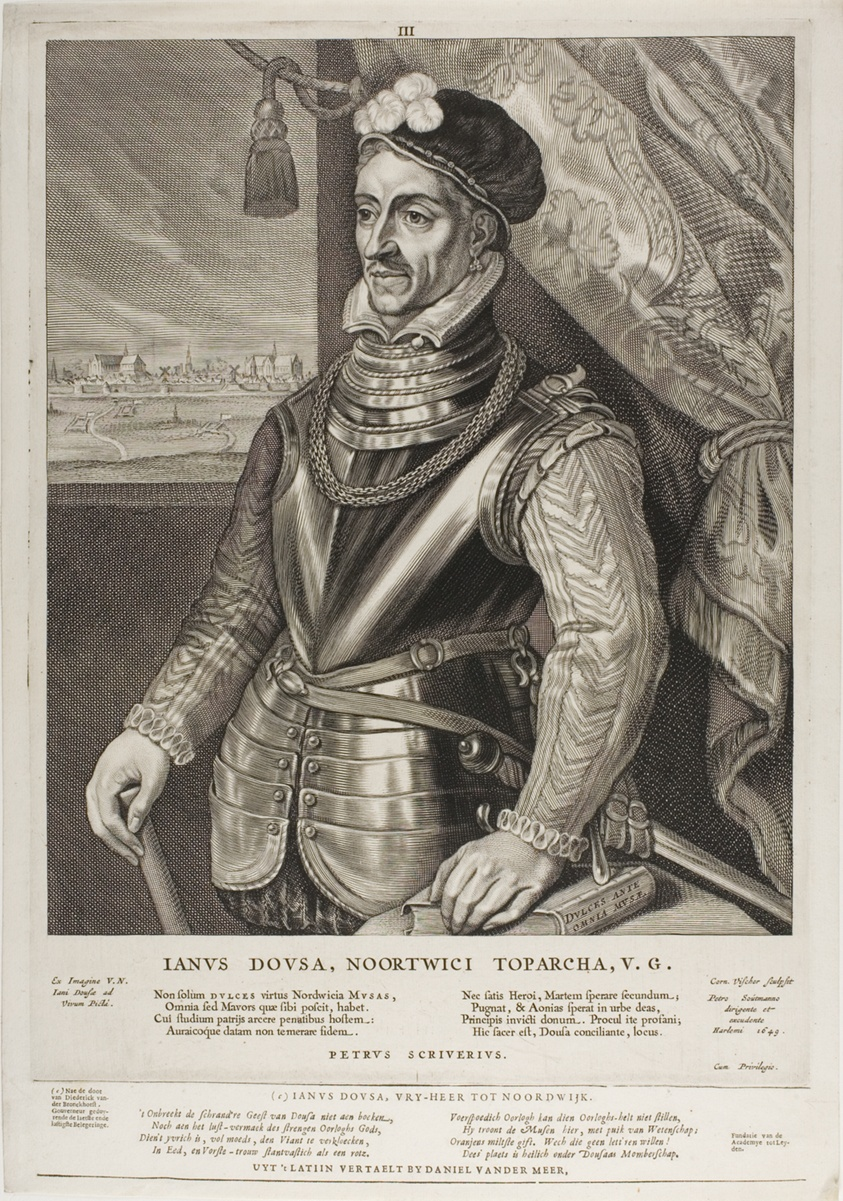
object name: Print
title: Jan van der Does, plate 3 from Quatuor Personae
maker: Cornelis Visscher (Dutch, c. 1629-1658)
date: 1649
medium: Engraving and letterpress on ivory laid paper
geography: Holland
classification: engraving; print; prints and drawing